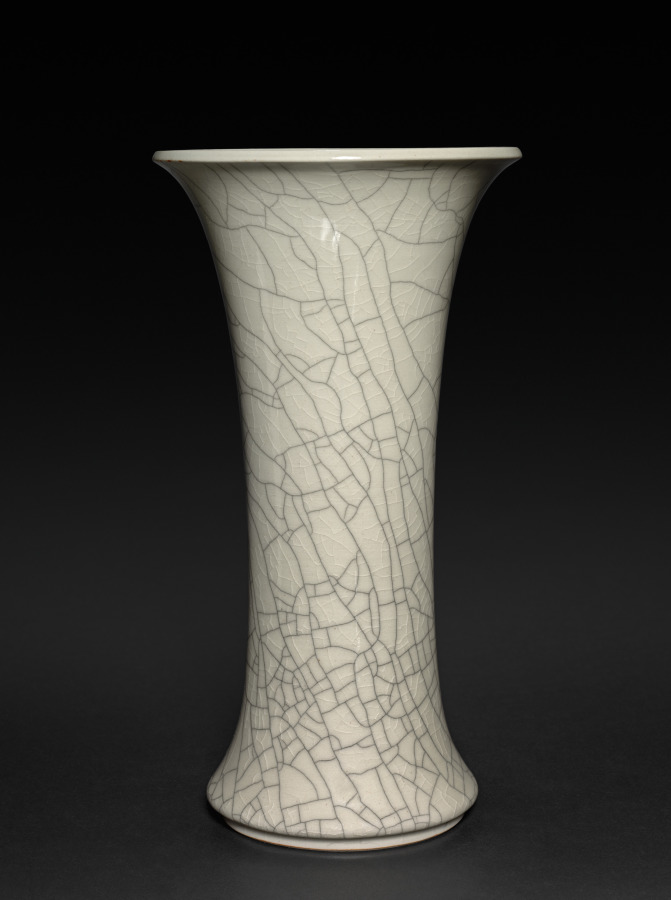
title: Gu-shaped Vase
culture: Japan, Meiji period (1868–1912)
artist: Seifū Yohei III (Japanese, 1851–1914)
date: 1912–14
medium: Porcelain with crackled glaze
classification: Ceramic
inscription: 清風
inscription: 清風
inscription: 帝室技芸員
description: Seifū Yohei III mined the repertoire of Chinese vessel types, from ceramics modeled after ancient ritual bronzes to shapes developed in the Yuan (1279–1368) and Ming (1368–1644) dynasties. His designs tended to be formal and restrained, often featuring creamy white glazes suggestive of the hue of Ding ware and green glazes resembling Longquan ware. This gu-shaped vase has a cracked-ice glaze, which was once customarily called Ge (Japanese pronunciation Ka), after the kiln where it purportedly originated during the Southern Song dynasty (1127–1279). The glaze’s double-crackle pattern, featuring both deeper and shallower cracks, is called “gold threads and iron lines.” The effect was enhanced here by coating the vessel with ink or another stain, which was allowed to seep into the cracks before the surface was wiped clean.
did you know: Gu-shaped vases are relatively slender cylinders that flare at both the mouth and foot with orbs or drumlike forms partway up the vessel.